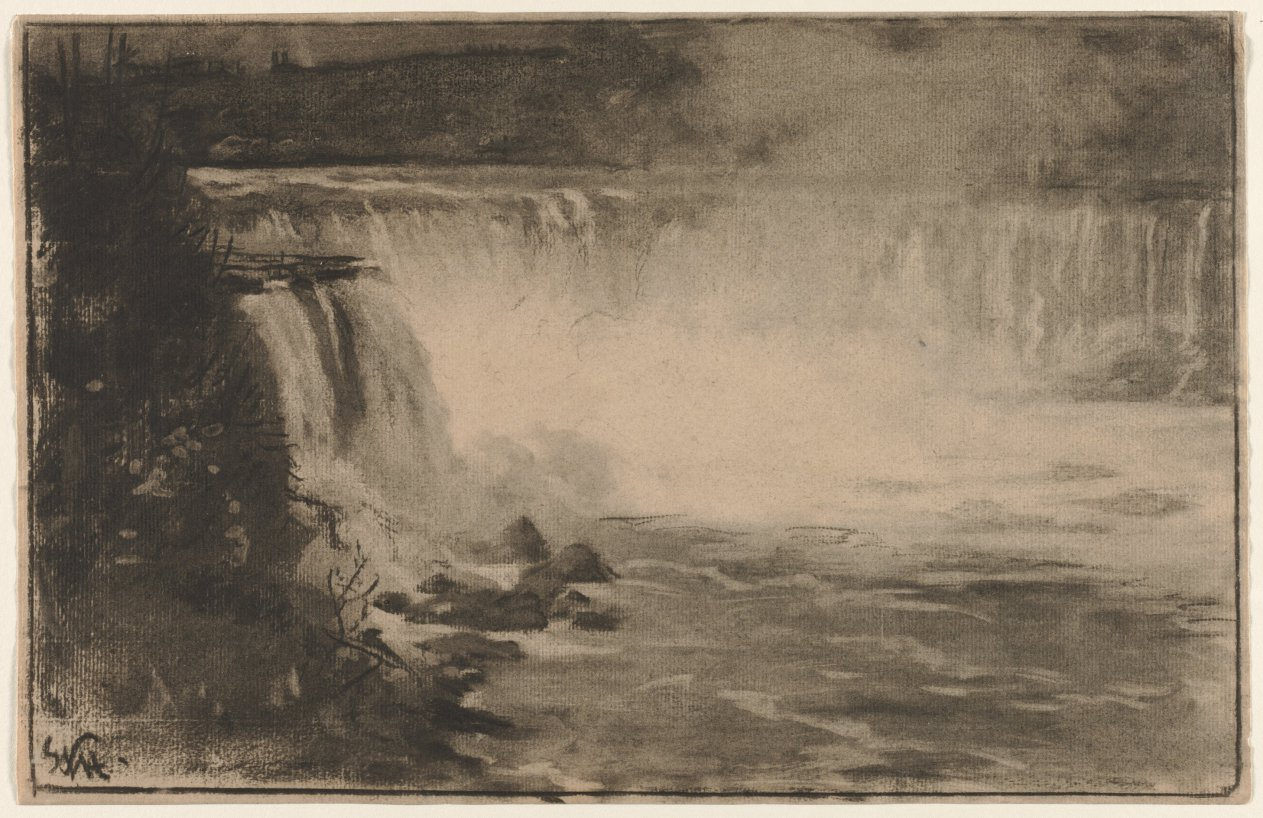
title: Niagara Falls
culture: America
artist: William Morris Hunt (American, 1824–1879)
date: 1878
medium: charcoal and brush and charcoal wash; framing lines in charcoal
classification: Drawing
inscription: signed, lower left, in charcoal: [artist monogram: WMH.]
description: Hunt studied with the famous French painter of peasant scenes, Jean-Francois Millet (1814–1875), and played a major role in introducing the loose brushwork of advanced French painting into American art. In 1878, only a year before his tragic suicide, Hunt visited Niagara Falls. There he produced a remarkable group of pastels, charcoal drawings, and paintings in which the physical particulars of the scene appear to dissolve into a near-abstract pattern of water and mist.